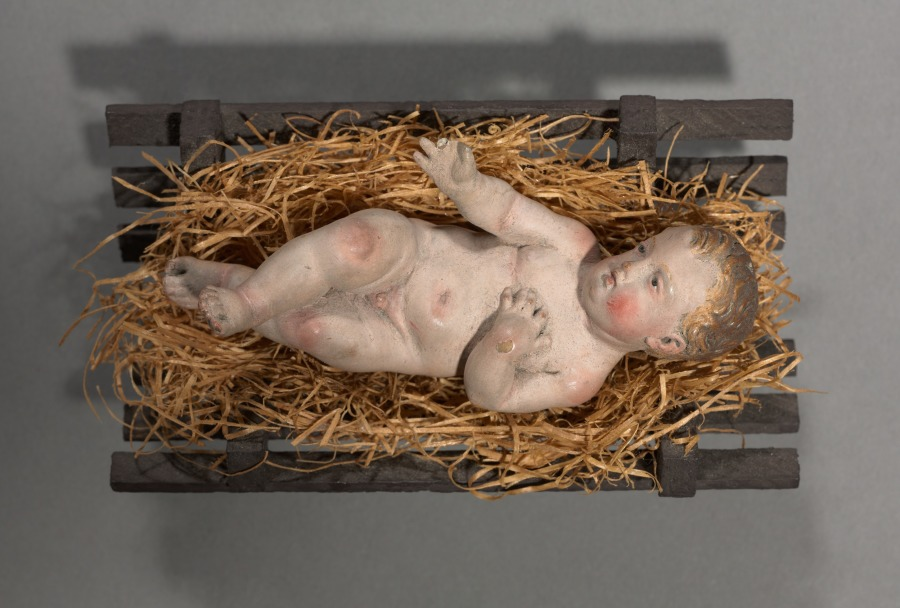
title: Figure from a Crèche: Infant Christ with Crib and Straw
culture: Italy, Naples, late 18th-early 19th century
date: 1780–1830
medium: painted terracotta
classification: Sculpture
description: The practice of creating scenes of the Nativity for the home dates from the early 1700s in Italy, where people began to set up doll-like figures of about a foot or less in height. The custom was particularly popular in Naples around 1800, where crèche scenes (crèche means cradle, or crib) included many figures, whose heads and hands of painted terracotta, stuffed cloth bodies, and clothing adapted from contemporary local costumes gave them an amazingly realistic character. Representations of the birth of Jesus can be traced to the first few centuries of Christianity. Both living creatures and sculptural depictions of them were used from early times. By the late middle ages it was customary to create life-size figures of wood or stone, naturalistically painted, to represent the characters who participated in the events of Jesus's early life. These sculptures were then arranged in scenes illustrating one or both of the most important of these events, the Adoration of the Shepherds and the Adoration of the Magi-the three kings from the East who came to pay homage to the Christ child. Used in churches, these large figures were especially popular in Italy, Central Europe, Spain, and Portugal. This Object in Focus presentation was organized by Henry Hawley, Curator of Renaissance and Later Decorative Arts and Sculpture.